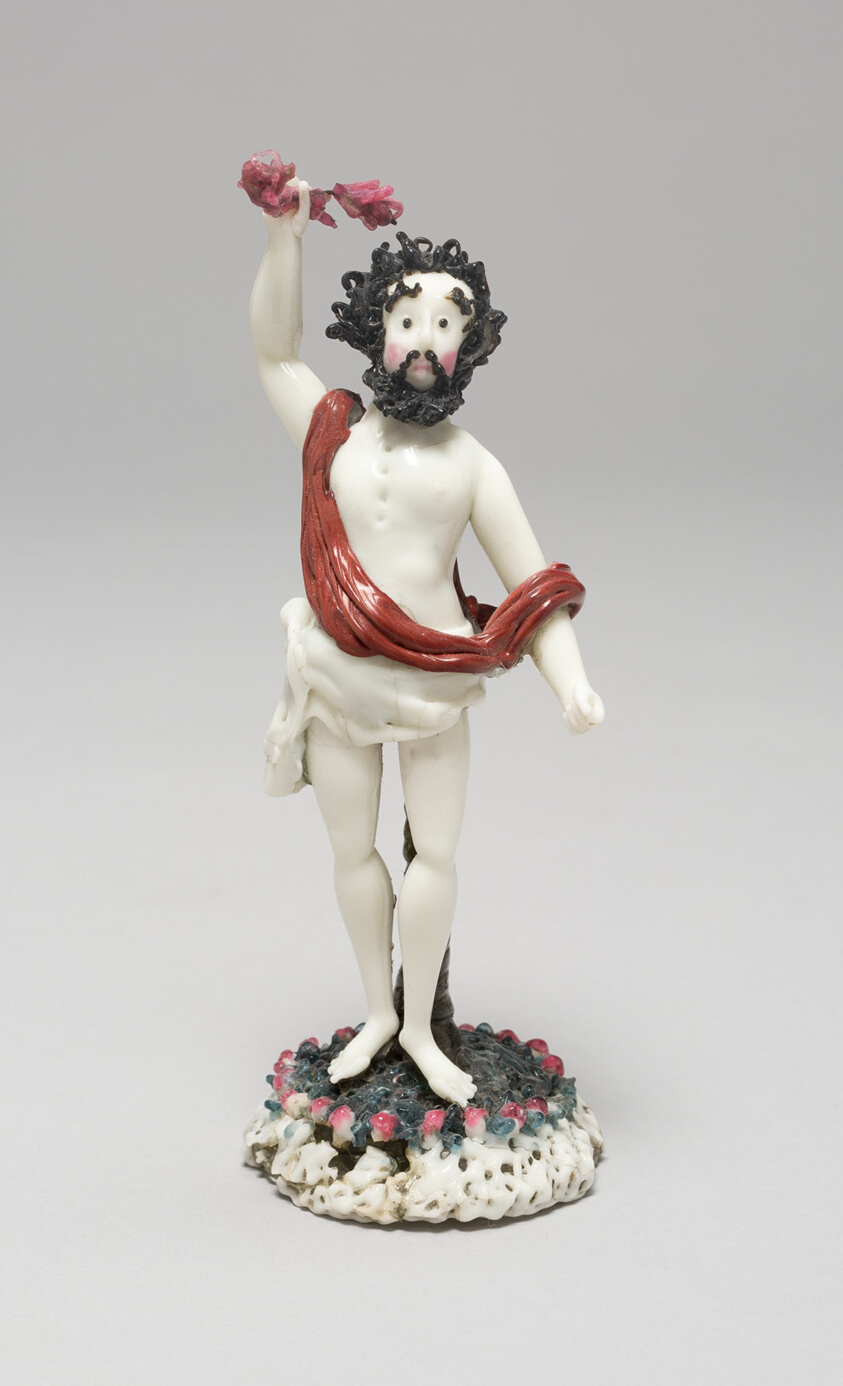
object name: Glass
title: Jupiter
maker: Nevers, France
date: 18th century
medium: Glass; lampwork (verre de Nevers), metal armature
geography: France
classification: decorative object/ornament; lampwork; glass; european decorative arts